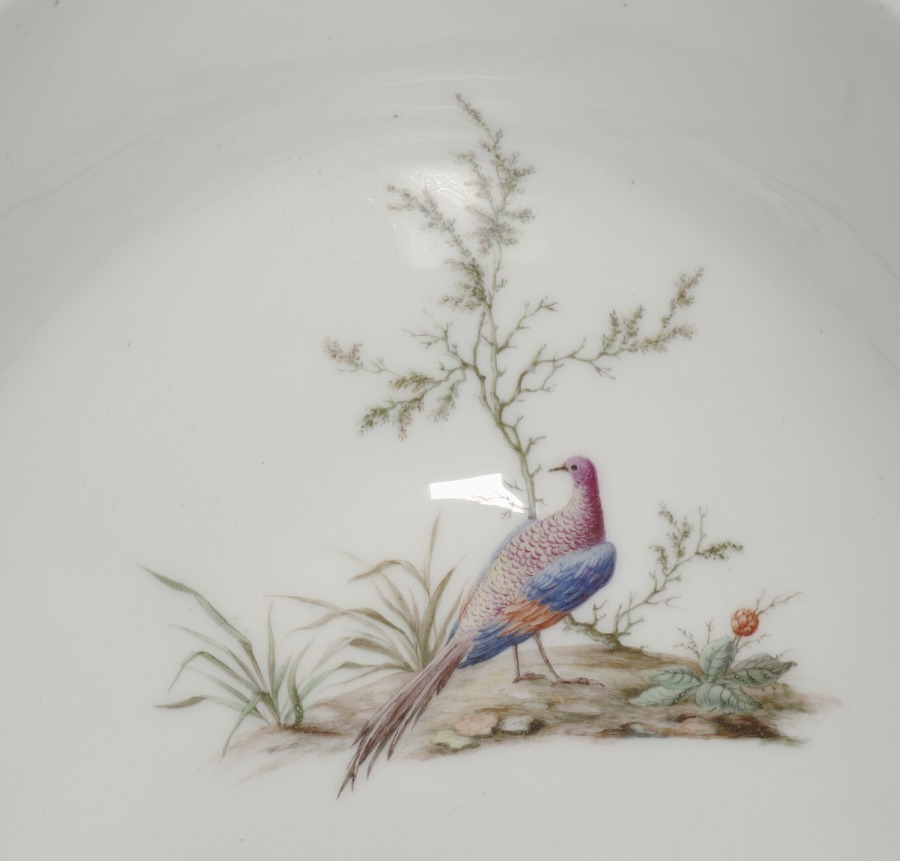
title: Covered Tureen (Terrine ancienne or Terrine ordinaire)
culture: France, Vincennes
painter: attributed to Louis-Denis Armand (French, active c. 1745–1783)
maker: Vincennes Porcelain Factory (France, 1740–56)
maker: probably by Jean-Claude Duplessis le Père (French, 1690–1774)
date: c. 1752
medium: soft-paste porcelain with enamel and gilt decoration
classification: Ceramic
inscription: [Interlaced foliate 'L's surmounted by a fleur-de-lys (indicating royal commision), in blue]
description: The intricately painted birds that decorate this tureen are the work of Louis-Denis Armand. Armand was known for his depictions of birds and landscapes, a specialty that may have come from his work as a painter of lacquered furniture with similar compositions. This tureen was likely designed by master goldsmith Jean-Claude Duplessis who began working as an artistic director at the Vincennes Porcelain Factory in 1748.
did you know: This object was manufactured in soft-paste porcelain, a material used by many European porcelain factories before they were able to emulate the hard-paste porcelain of China and Japan.